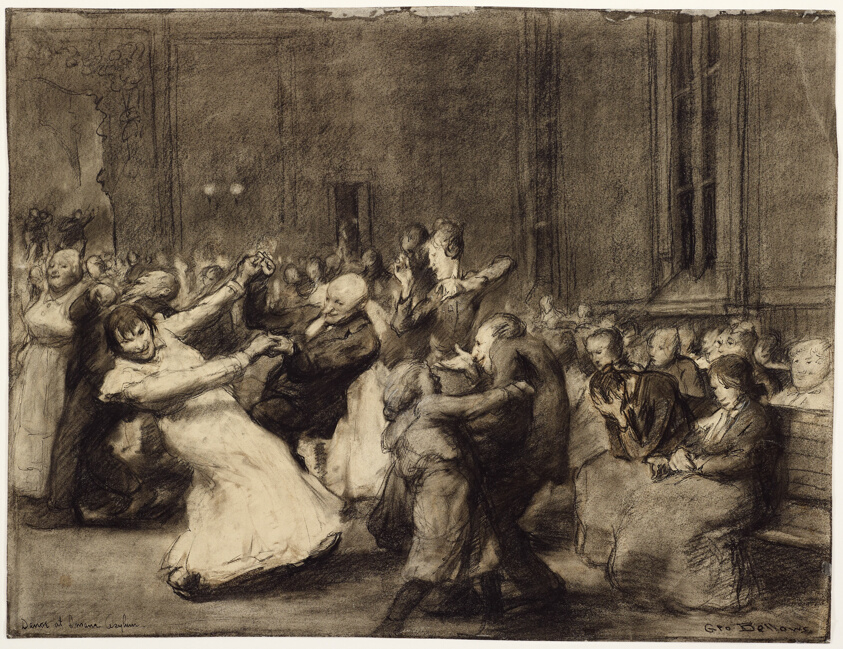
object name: Drawing and Watercolor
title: Dance at Insane Asylum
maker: George Wesley Bellows (American, 1882-1925)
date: 1907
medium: Charcoal, with stumping, pen and black ink, brown crayon, and touches of white chalk on ivory wove paper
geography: United States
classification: charcoal; drawings (visual works); prints and drawing